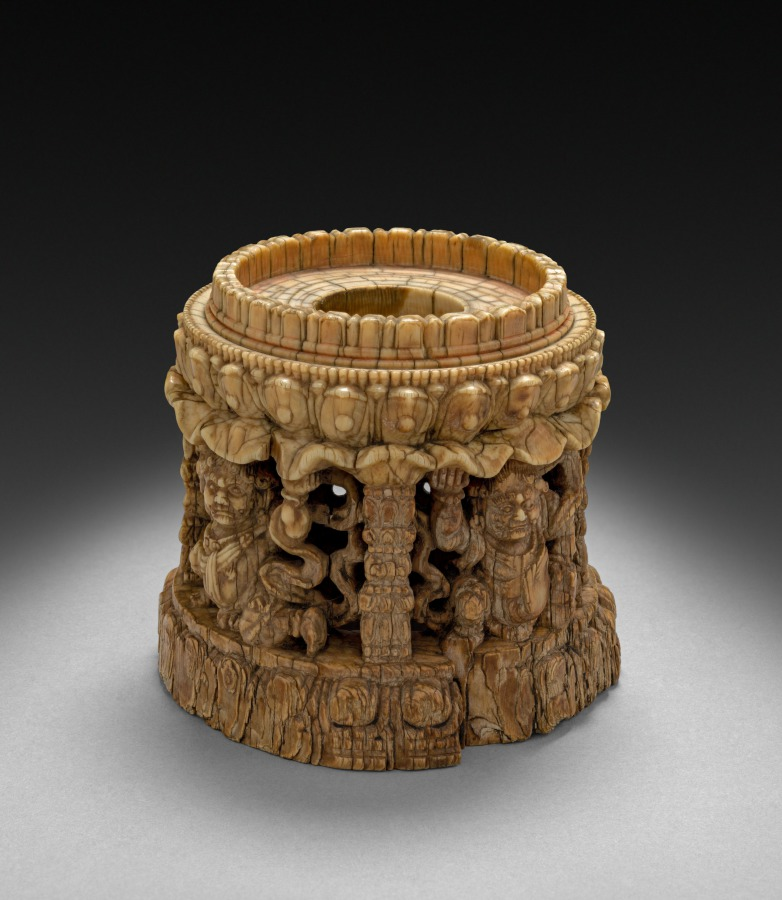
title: Pedestal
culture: China, Tang dynasty (618-907)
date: mid-700s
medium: ivory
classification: Sculpture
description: Small circular pedestal or stand for an icon or figure, most probably a Buddha. Starting from the base of the pedestal, there is a band of pearling or beading, a row of everted lotus petals, four dwarf-like creatures alternating with four square columns, a lotus leaf, another row of lotus petals, their stamens and anthers, and finally a row of alternating large and small elements retaining traces of a red stain and probably representing stylized lotus petals. The pedestal is in the form of a well-known type, the double lotus pedestal (visvapadma), which was particularly popular in the second half of the sixth century, being found in most of the Chinese cave sites of that period. This pedestal however, represents a later continuation of the type.